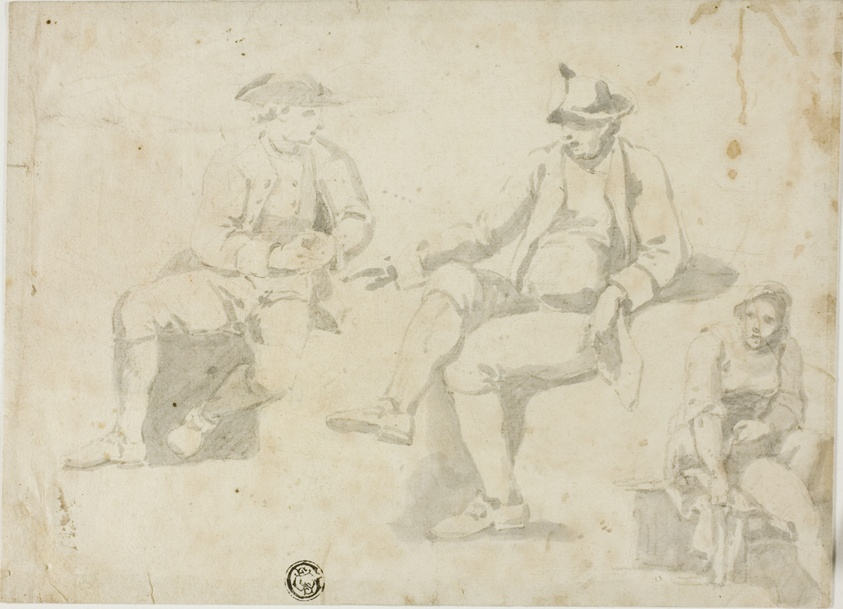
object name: Drawing and Watercolor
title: Three Sketches of Seated Figures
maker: Unknown Artist; European, 17th/18th century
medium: Brush and gray wash, over black chalk, on ivory laid paper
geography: Europe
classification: ink or chalk wash; drawings (visual works); prints and drawing